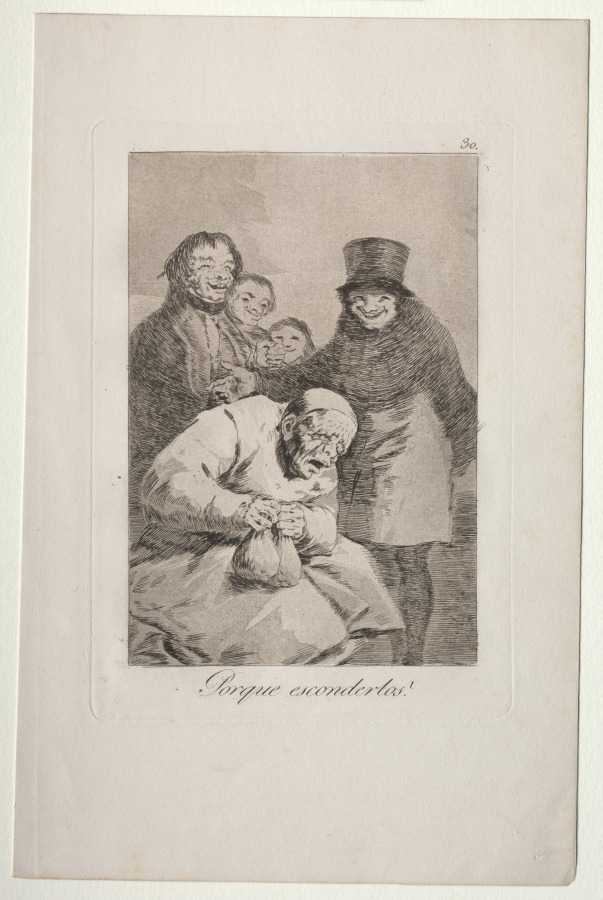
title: Why Hide Them?, Plate 30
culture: Spain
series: Los Caprichos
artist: Francisco de Goya (Spanish, 1746–1828)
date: 1799 (printed c. 1855)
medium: etching and aquatint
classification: Print